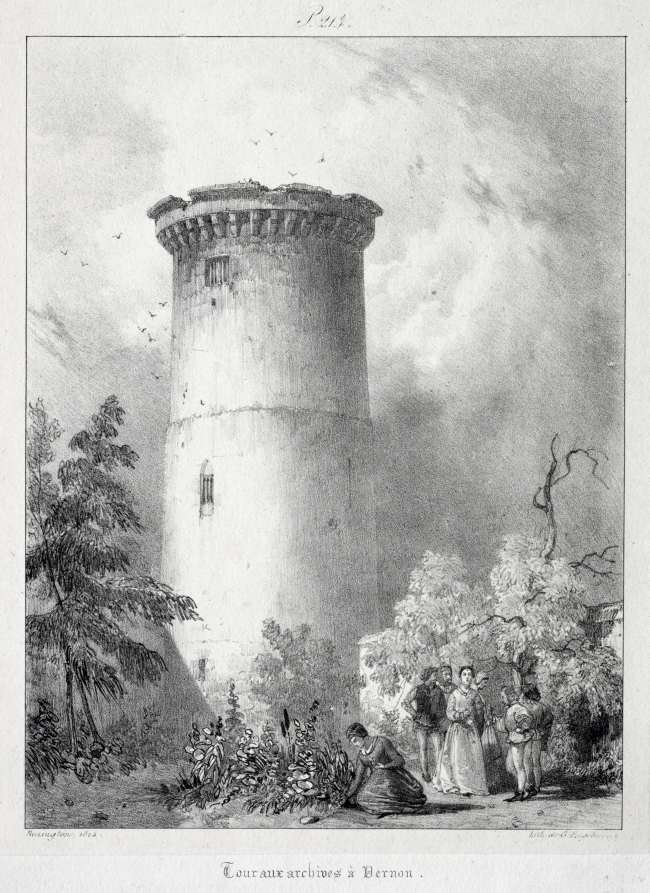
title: Voyages pittoresques et romantiques dans l'ancienne France, Normandie: Tour aux archives à Vernon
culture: England, 19th century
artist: Richard Parkes Bonington (British, 1802–1828)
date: 1824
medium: lithograph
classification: Print